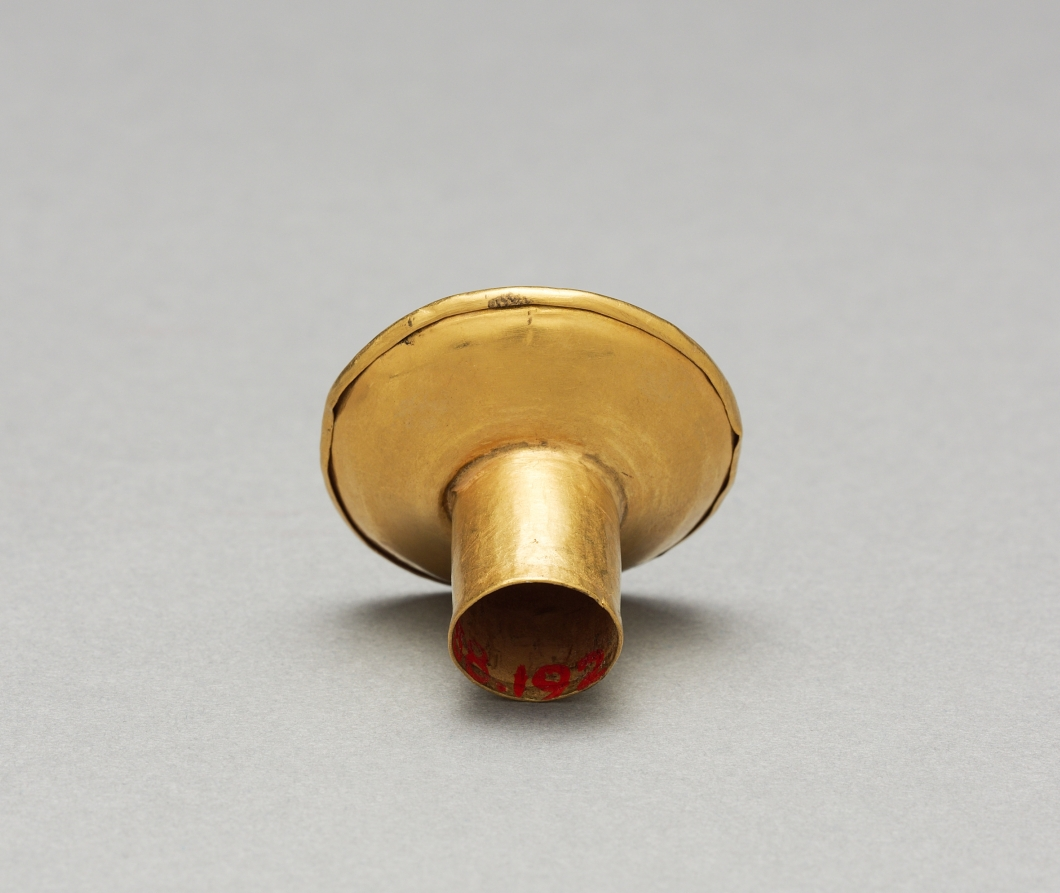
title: Ear Spool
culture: Panama, Conte style, 5th - 10th century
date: c. 400–900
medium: hammered gold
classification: Metalwork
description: Harvard archaeologists excavated these and seven other ornaments from several burials at Sitio Conte, a cemetery famous for its lavish graves of powerful chieftains. The young man buried in Grave 26 was such a chief. His status was stunningly memorialized by 21 human companions and 475 objects, many of them personal ornaments made of gold, including a large chest plaque and a rod-shaped ear ornament.